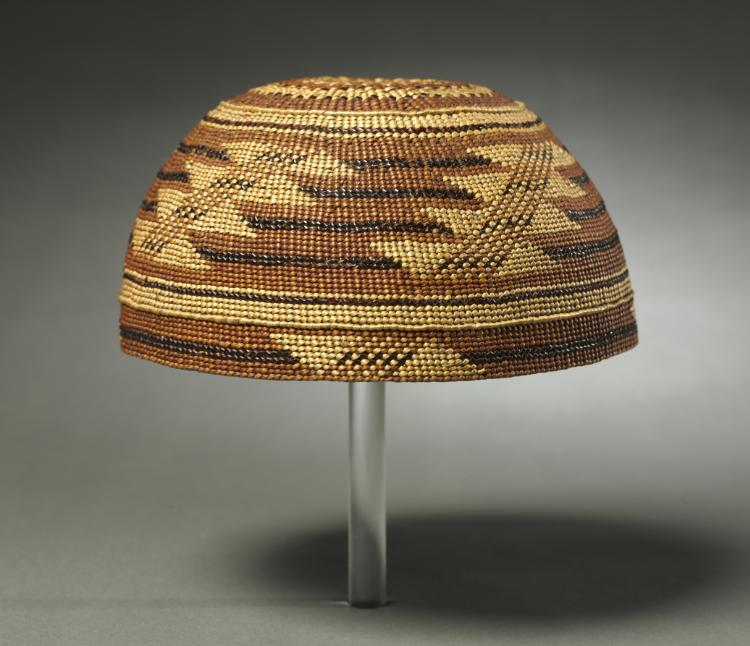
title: Hat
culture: California, Karok, Humboldt County, 20th century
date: c. 1900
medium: hazel, conifer root, woodwardia fern, bear grass, maiden-hair fern; twine (4-strand twine)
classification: Basketry